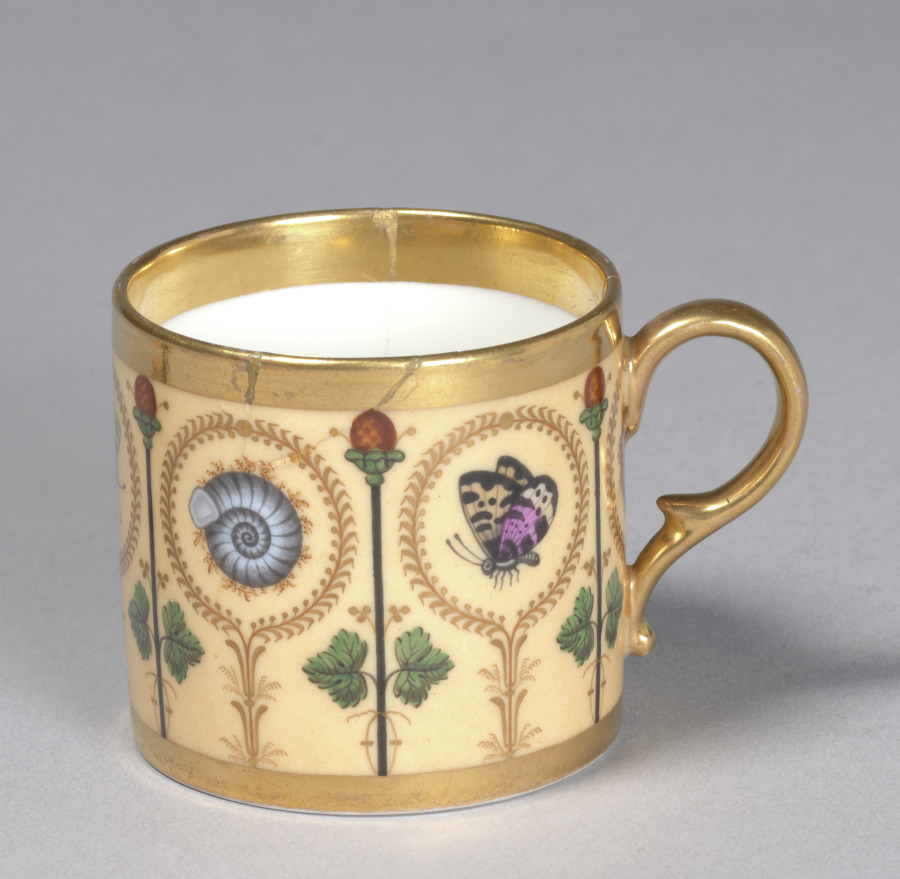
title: Cup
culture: France, 19th century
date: c. 1800–1810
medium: porcelain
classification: Ceramic